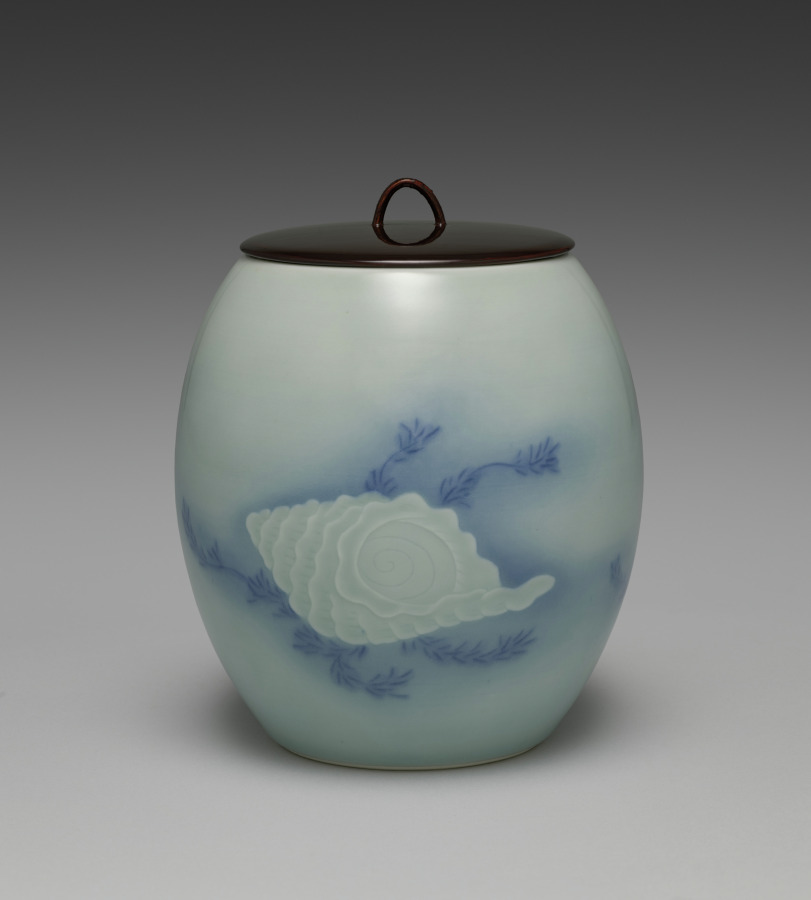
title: Water Container with Shell and Seaweed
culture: Japan, Meiji period (1868–1912) or Taishō period (1912–26)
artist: Seifū Yohei IV (Japanese, 1872–1951)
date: 1914–46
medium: Porcelain with underglaze blue, blue glaze and molded design and lacquered wood lid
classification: Ceramic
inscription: 清風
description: Yohei IV chose an aquatic theme for this mizusashi. He applied clay to the surface and molded the shape of a large conch on one side and, on the other, a clam and a scallop. The finer details he incised into the surface of his low-relief shapes. He then painted seaweed as though it were coming out from behind the sea creatures, and he further set off the animals using a masking technique with a gradated blue surround. Finally, he applied a translucent blue glaze, identified on the box as mizusai, over the entire body of the vessel. The resulting effect is that one imagines having descended through the water to the ocean floor.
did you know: A mizusashi, water container, is an essential utensil for a tea ceremony.